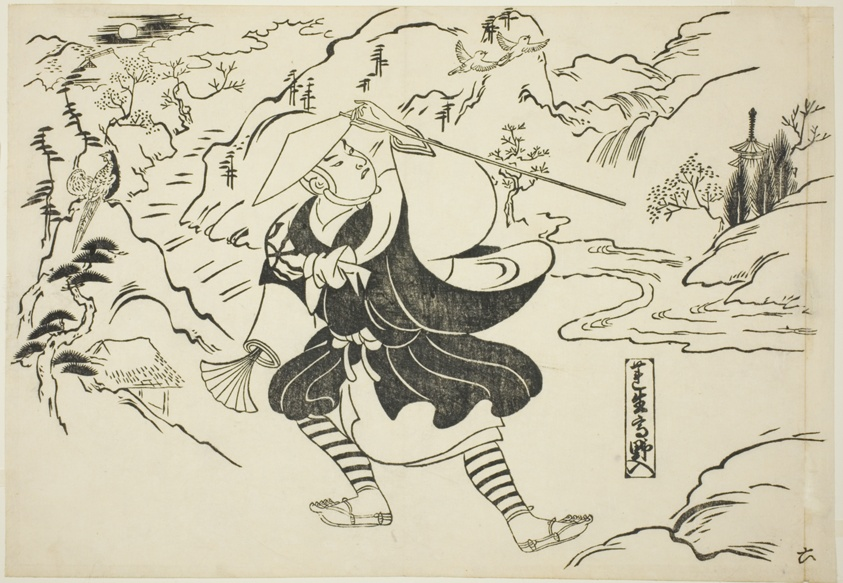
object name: Print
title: Rensho arriving at Mt. Koya (Rensho Koya-iri), from the series "Famous Scenes from Japanese Puppet Plays (Yamato irotake)"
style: Japanese (culture or style)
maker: Okumura Masanobu (Japanese, 1686-1764)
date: c. 1705/06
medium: Woodblock print; oban, sumizuri-e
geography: Japan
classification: woodblock print; print; asian art; woodblock